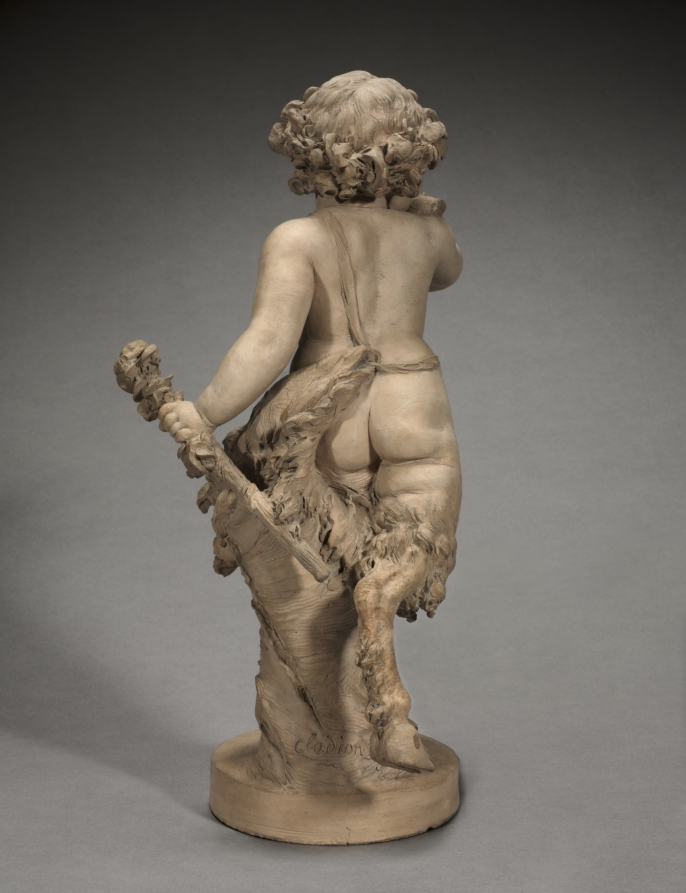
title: Young Satyr Running with an Owl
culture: France, 18th century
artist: Clodion (French, 1738–1814)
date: 1770s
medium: terracotta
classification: Sculpture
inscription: signature incised on back: CLODION.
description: These works by French sculptor Claude Michel, known as Clodion (1738–1814), shows a pair of young satyrs. Clodion was fond of depicting characters from classical antiquity in his work, and the subject of child or baby satyrs in Bacchanalian celebrations appear often in the work of Rococo artists. The female satyr wraps a plump arm around a nest filled with baby birds, while her male counterpart holds an owl. Balancing on one foot, the two flee the scene of their theft.